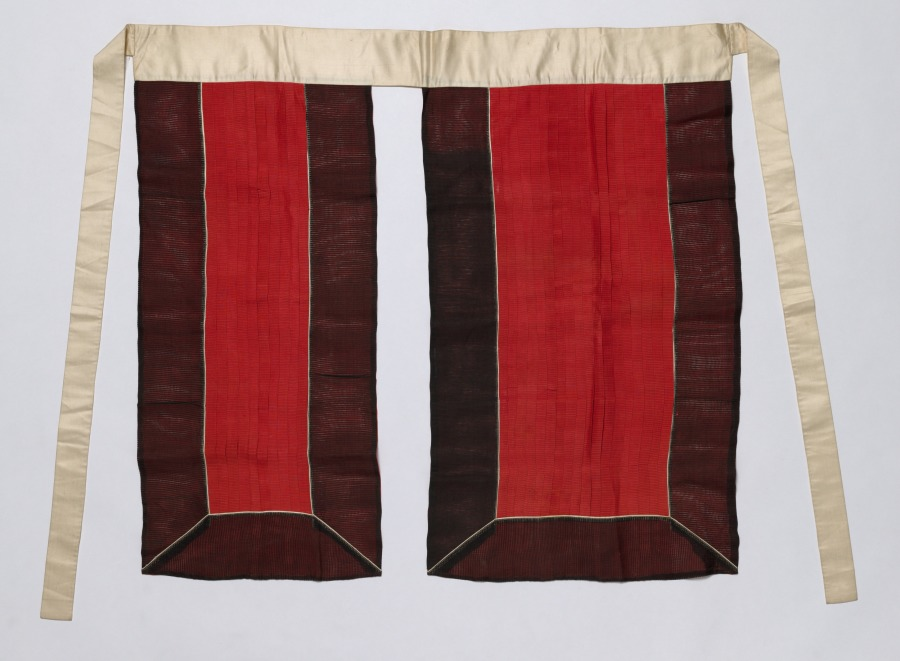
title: Skirt for the Royal Ceremonial Costume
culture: Korea, Joseon dynasty (1392–1910)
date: late 1800s–early 1900s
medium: red and black silk, gauze weave, with white silk satin waistband and ties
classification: Garment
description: This is a set of royal ceremonial robe and accessories worn by a high-ranking court official for attending special state ceremonies. The set consists of an inner coat, an outer coat, a skirt, a back apron, a crown, a pair of jade tassels, a tablet, and a belt.